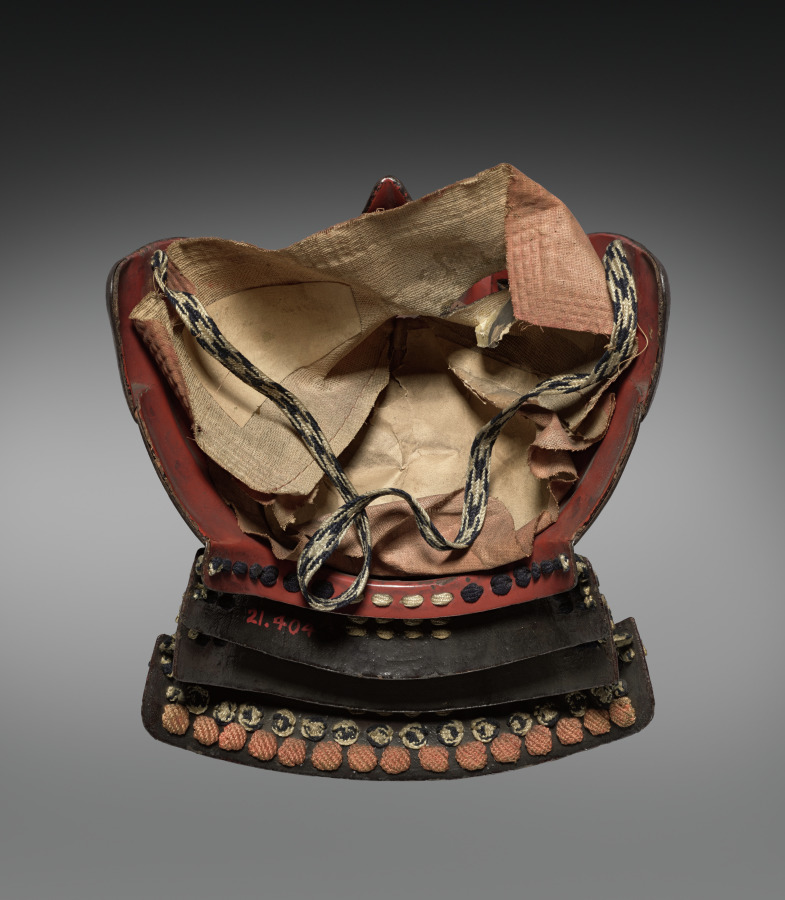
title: Half-mask (Ho’o-ate) with Neck Guard (Nodowa)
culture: Japan, Edo period (1615–1868)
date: 1600s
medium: Iron, lacquer, textile (silk)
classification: Arms and Armor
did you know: There is a painted face inside the mask.